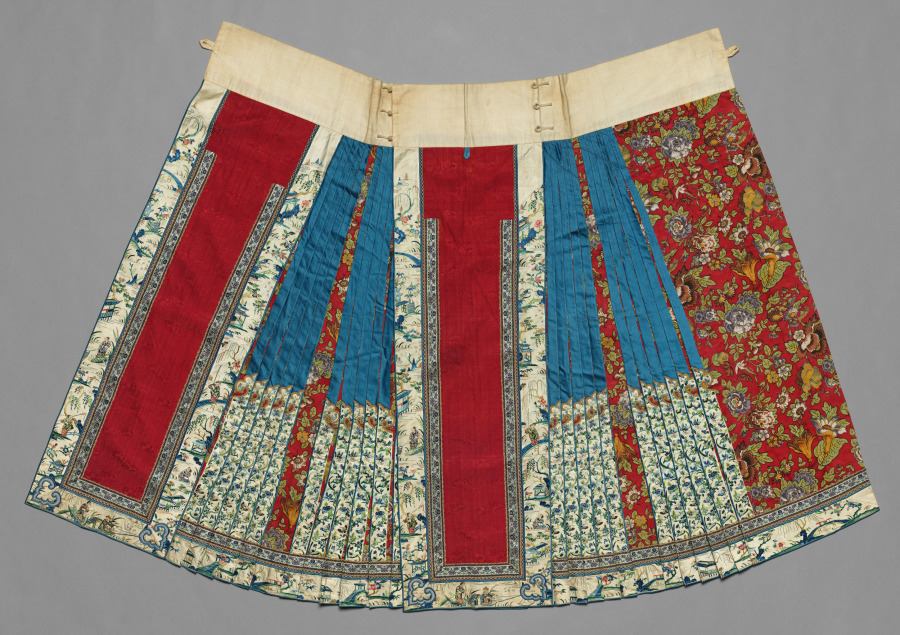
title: Skirt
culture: China, Qing dynasty (1644-1911)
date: 1800s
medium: Silk, cotton: embroidery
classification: Garment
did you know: This skirt includes both embroidered sections and polychrome printed fabric.